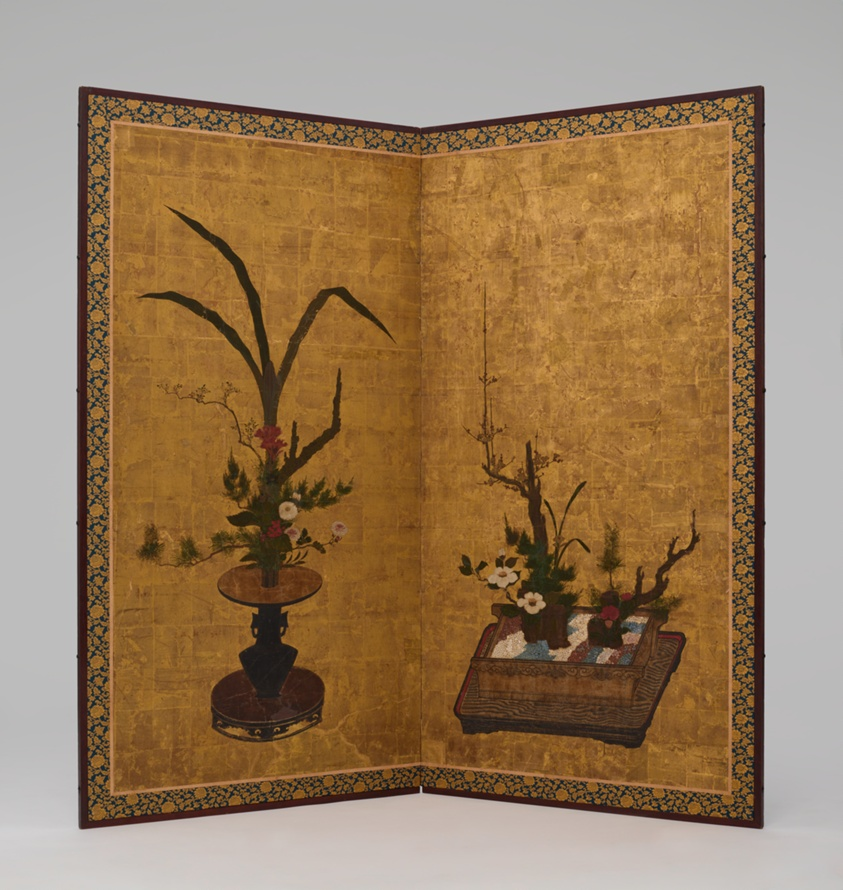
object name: Painting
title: Flower Arrangements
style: Japanese (culture or style), momoyama, Japanism, East Asian, asian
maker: Artist unknown; Japanese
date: active 17th century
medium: Two-panel screen; ink, colors and gold on paper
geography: Japan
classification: screen; painting; asian art